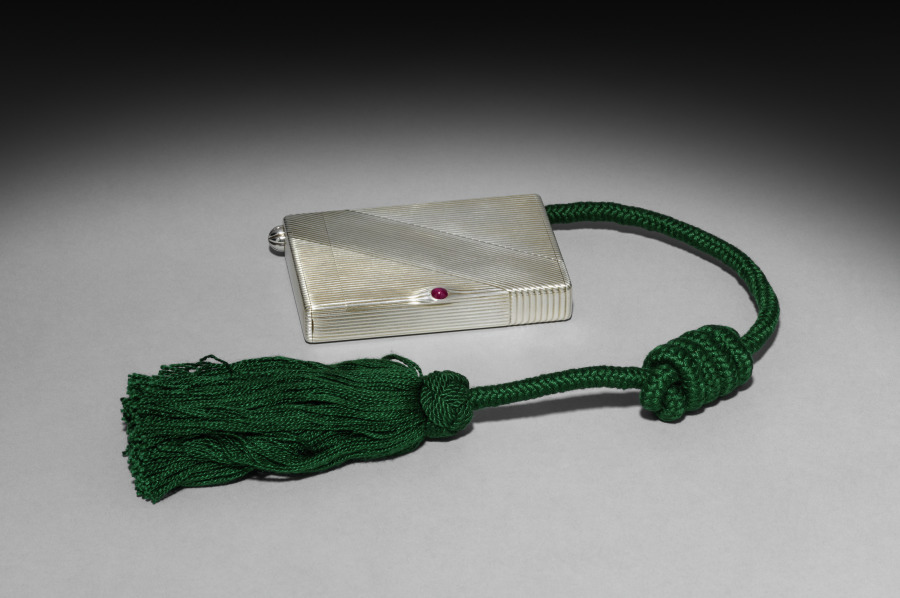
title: Cigarette Case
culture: Russian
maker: House of Fabergé (Russian, 1842–1918)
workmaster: August Hollming (Finnish, 1854–1913)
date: 1911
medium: Silver, ruby, textile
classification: Silver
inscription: Signed with initials of the workmaster August Hollming (active 1880-1913)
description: Fabergé offered variations of a cigarette case model such as this example, using different materials, surface treatments, and ornamentation. Accommodating individual clients’ wishes, the firm would also add a family insignia or additional decoration. The finely ridged surface demonstrates the superb handling of the precious metal by August Hollming, a Finnish master who worked for Fabergé in Saint Petersburg.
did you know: The cigarette case also includes a compartment for a match striker.